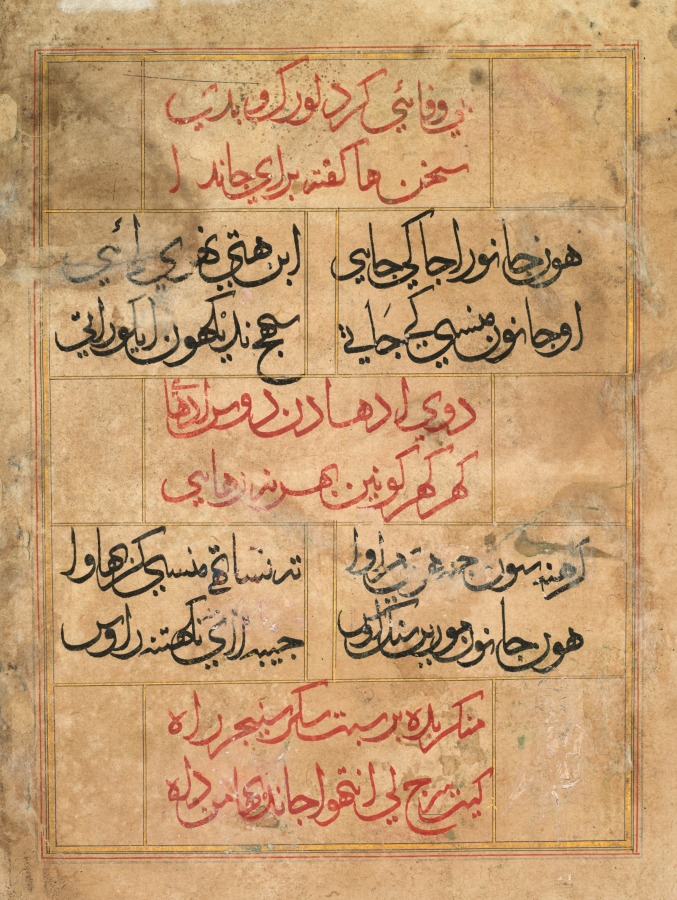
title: A traveler persuades Lorik to return home (top); Chanda objects (bottom), from a Chandayana (Story of Chanda)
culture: Sultanate India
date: c. 1540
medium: gum tempera, ink, and gold on paper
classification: Painting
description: Chanda is the heroine of a Sufi romance. The Sufis are a mystical branch of Islam whose followers cultivate love for the divine. This painting is from a dispersed manuscript of the Chandayana painted in a style that was an important source for Mughal painting. Its artists integrated Persian colors and delicate vine motifs with figures presented in profile, within flat, compartmentalized registers, which are horizontal divisions of space. The drama of their interactions is conveyed by means of animated gestures.